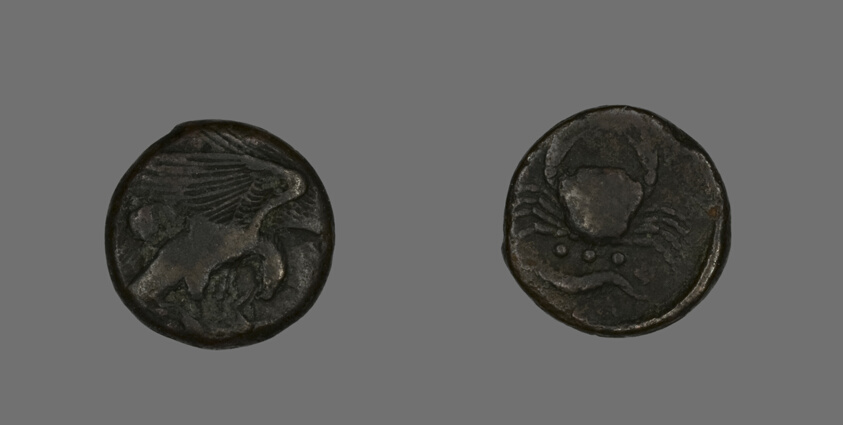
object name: Coin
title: Coin Depicting an Eagle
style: greek, ancient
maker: Greek; Agrigentum (now Agrigento), Sicily, Italy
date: 472-406 BCE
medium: Bronze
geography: Agrigento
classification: coin; ancient art; struck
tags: eagles, crabs